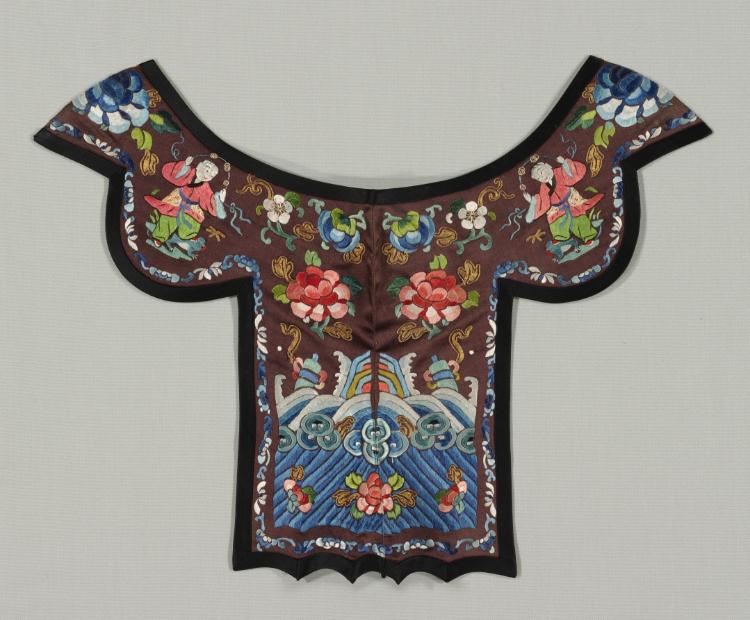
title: Wedding Cap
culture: China, Qing dynasty (1644-1911) or Republican period (1912-49)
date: late 1800s-early 1900s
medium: embroidery, silk and gold thread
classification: Embroidery